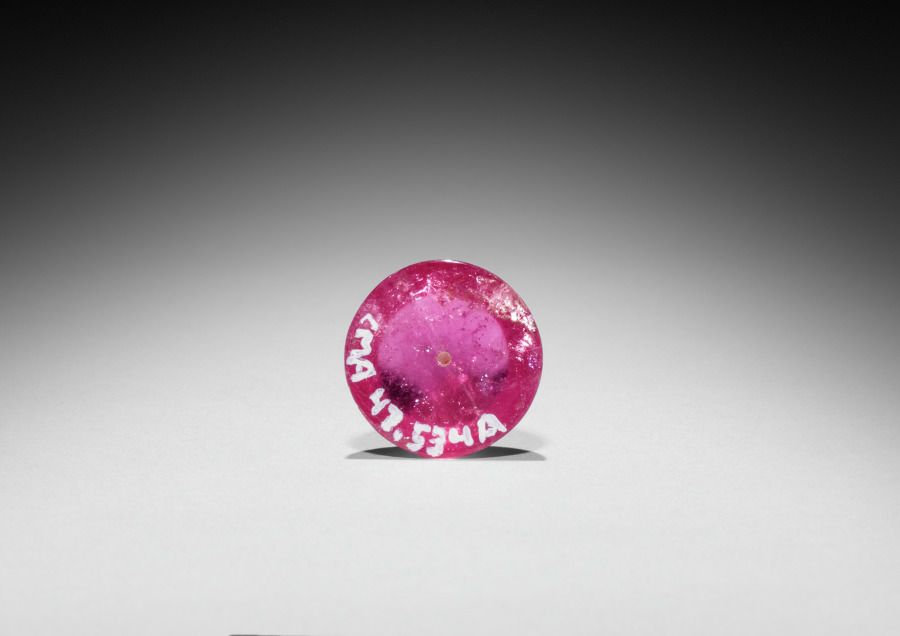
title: Snuff Bottle with Stopper (stopper)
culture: China, Qing dynasty (1644-1911)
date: 1800s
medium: rose quartz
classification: Jade